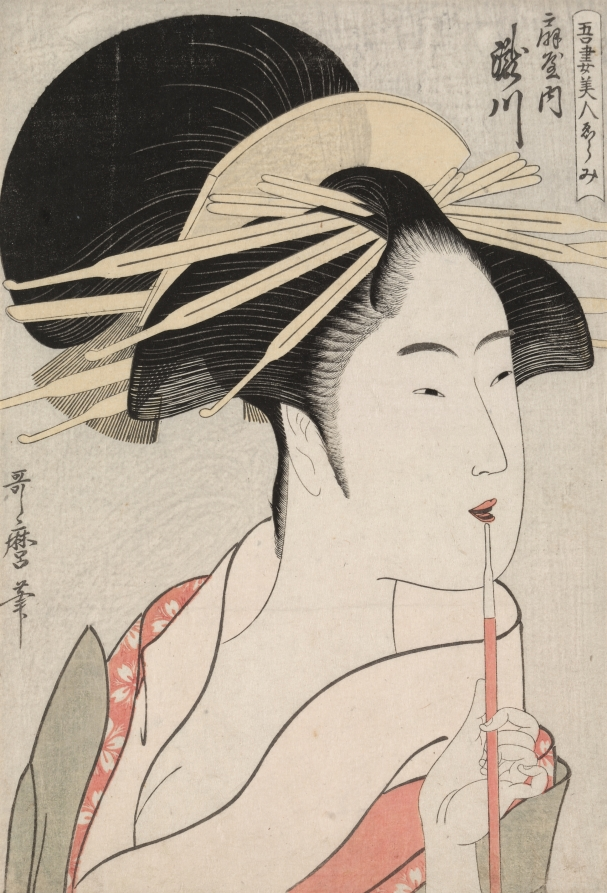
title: Takigawa of the Ōgiya from the series A Selection of Eastern Beauties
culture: Japan, Edo period (1615–1868)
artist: Kitagawa Utamaro (Japanese, c. 1754–1806)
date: c. 1798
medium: color woodblock print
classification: Print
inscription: Signature: Utamaro hitsu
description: The courtesan Takigawa worked for the Ōgiya, "House of Fans" brothel, one of the most prestigious in the Yoshiwara. Here, she smokes tobacco, a fashionable trend in 18th-century Edo. Fashion-conscious women in Edo purchased prints of the most famous beauties just as contemporary women buy fashion magazines to learn about the latest styles in make-up and hair. The strands of hair at her temple were printed from thin pieces of wood left in relief when the areas on either side of them were carved away.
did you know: Takigawa became the most senior courtesan of the Ōgiya following the retirement of Hanaōgi.